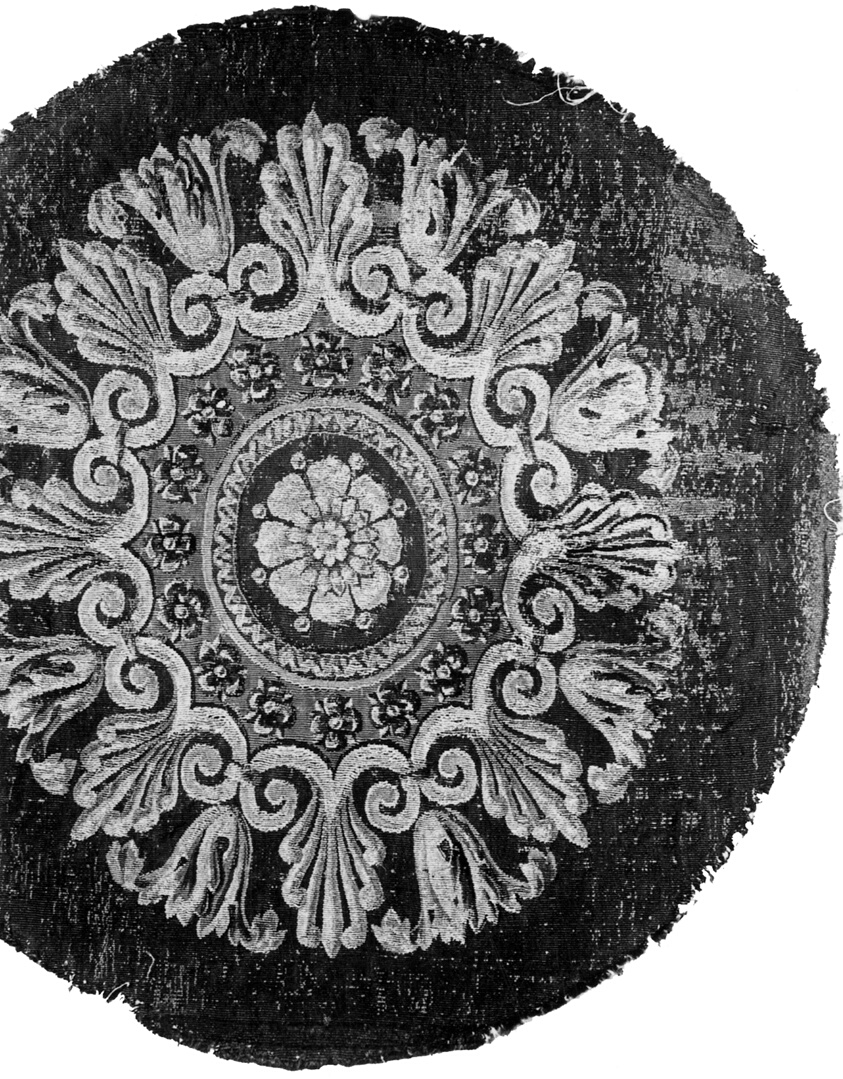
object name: Textile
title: Chair Cover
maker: France, Aubusson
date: 1775/1825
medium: Wool and silk, slit and double interlocking tapestry weave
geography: Aubusson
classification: weaving - tapestry; textile